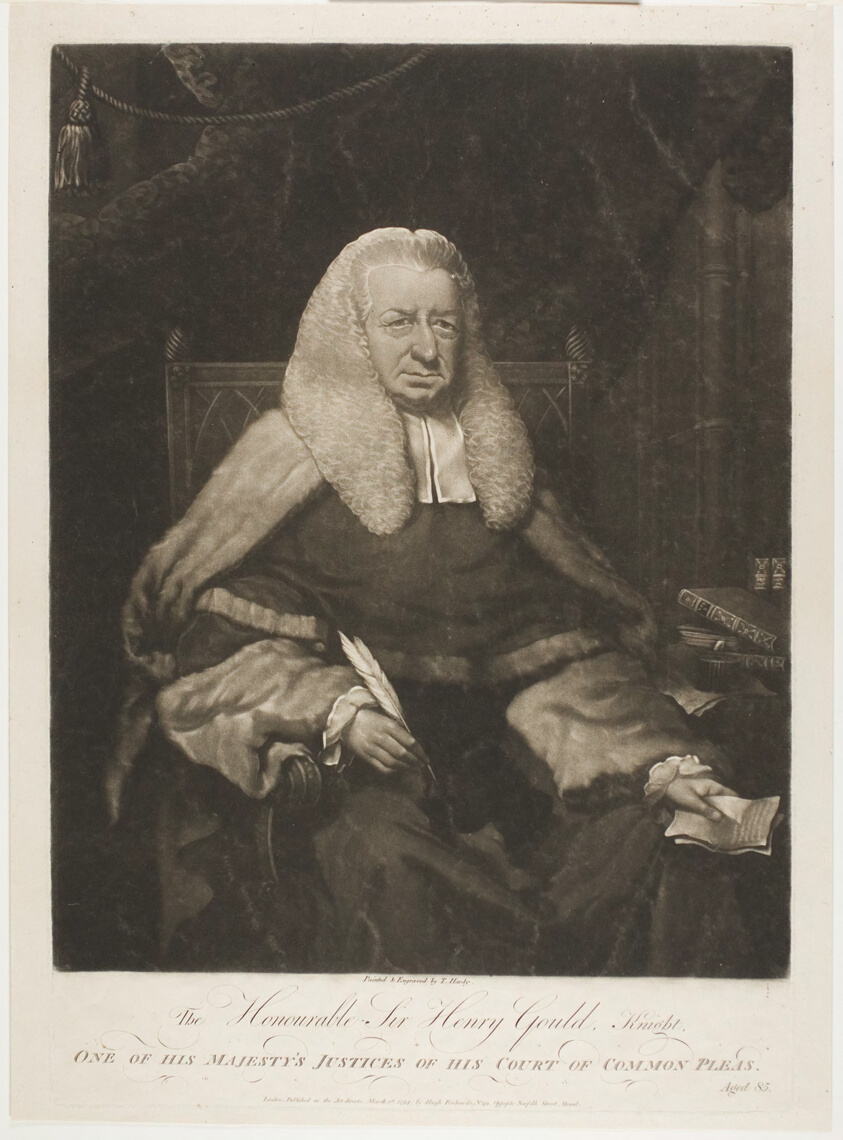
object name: Print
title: The Honorable Sir Henry Gould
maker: Thomas Hardy (English, 18th century)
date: 1794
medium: Mezzotint on ivory wove paper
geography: England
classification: mezzotint; print; prints and drawing